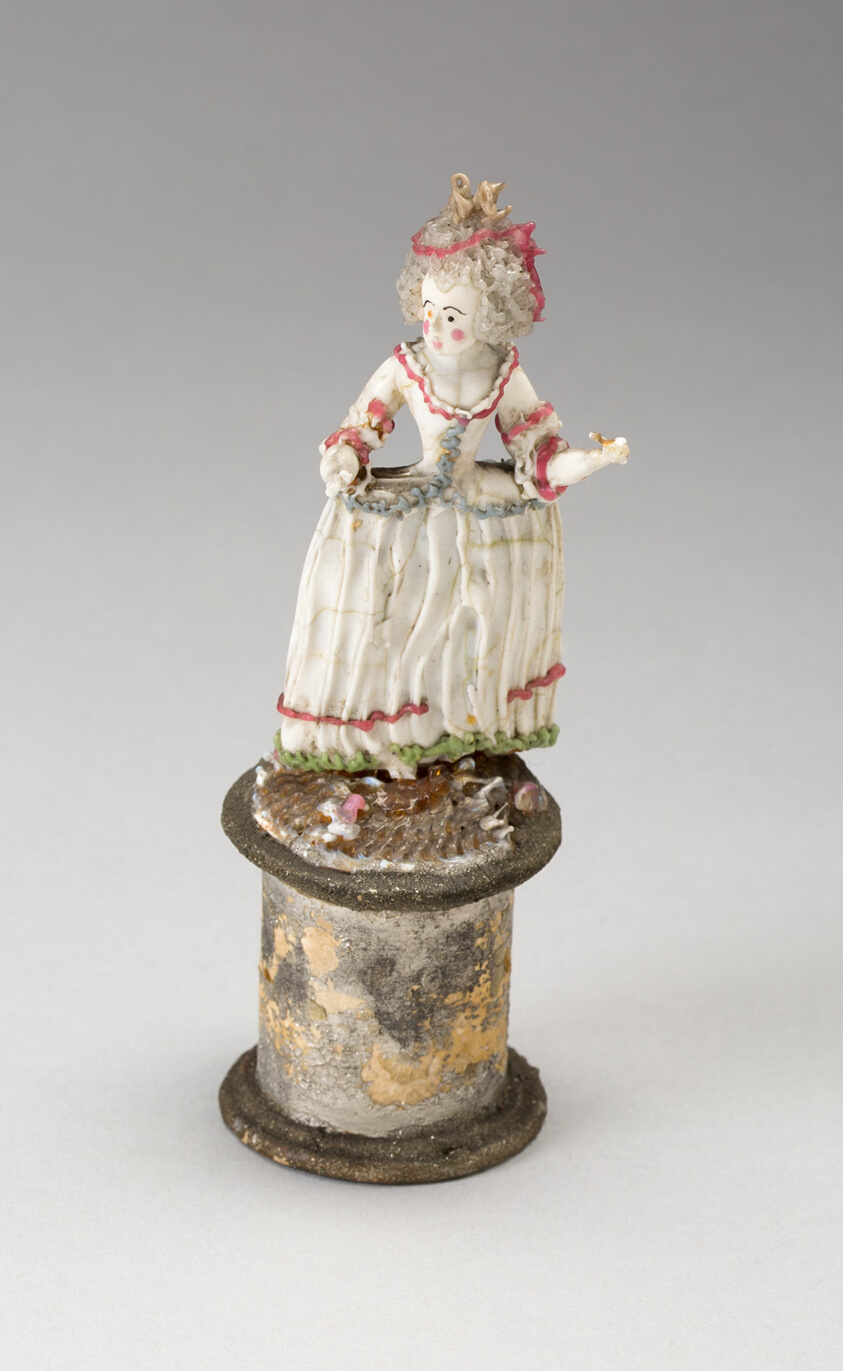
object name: Glass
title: Lady in a Wide Skirt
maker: Nevers, France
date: 1750/99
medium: Glass; lampwork (verre de Nevers), metal armature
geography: France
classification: glass; miniature; decorative object/ornament; european decorative arts